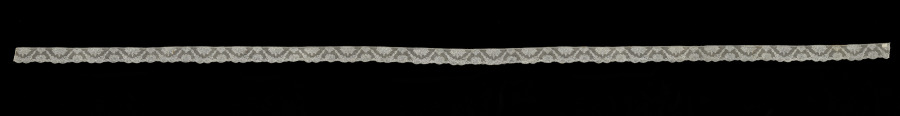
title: Lace Edging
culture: France, Valenciennes or Flanders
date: 1700s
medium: Linen: bobbin lace (Valenciennes)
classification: Lace